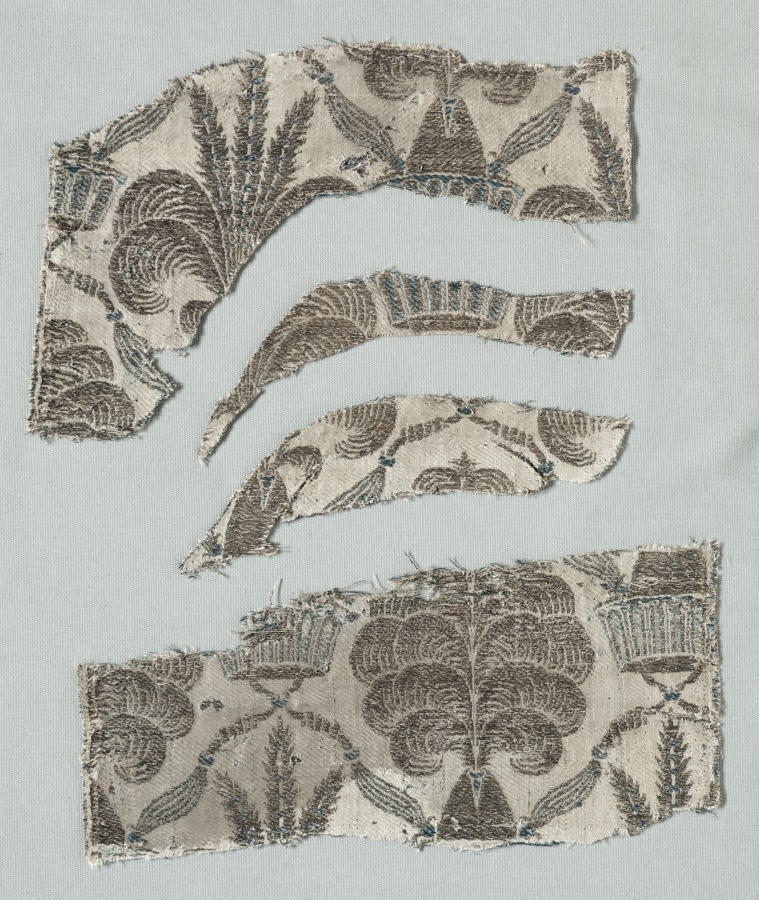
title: Silk Fragments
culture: Italy, last third of the 14th century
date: 1360–1399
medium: lampas weave, silk and gold thread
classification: Textile